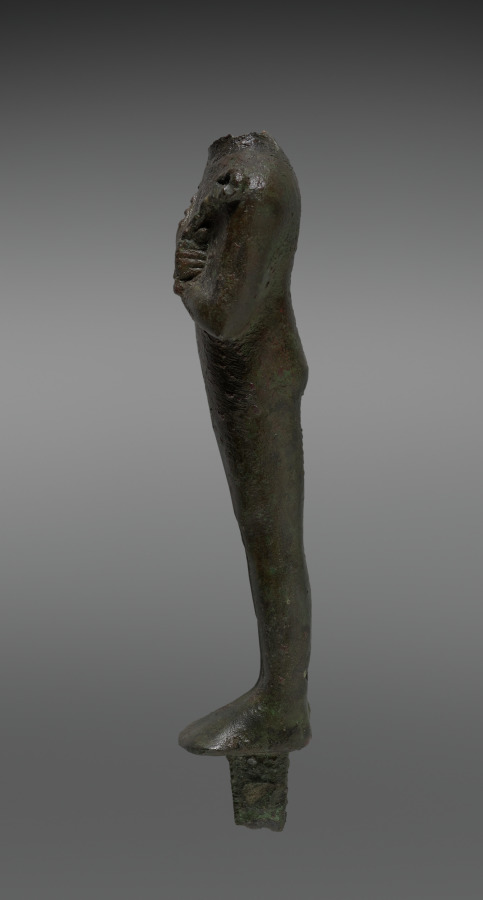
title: Statuette of Osiris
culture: Egypt, Late period (715–332 BCE), Dynasty 26 or later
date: 664–525 BCE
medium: black copper (?), hollow cast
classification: Sculpture